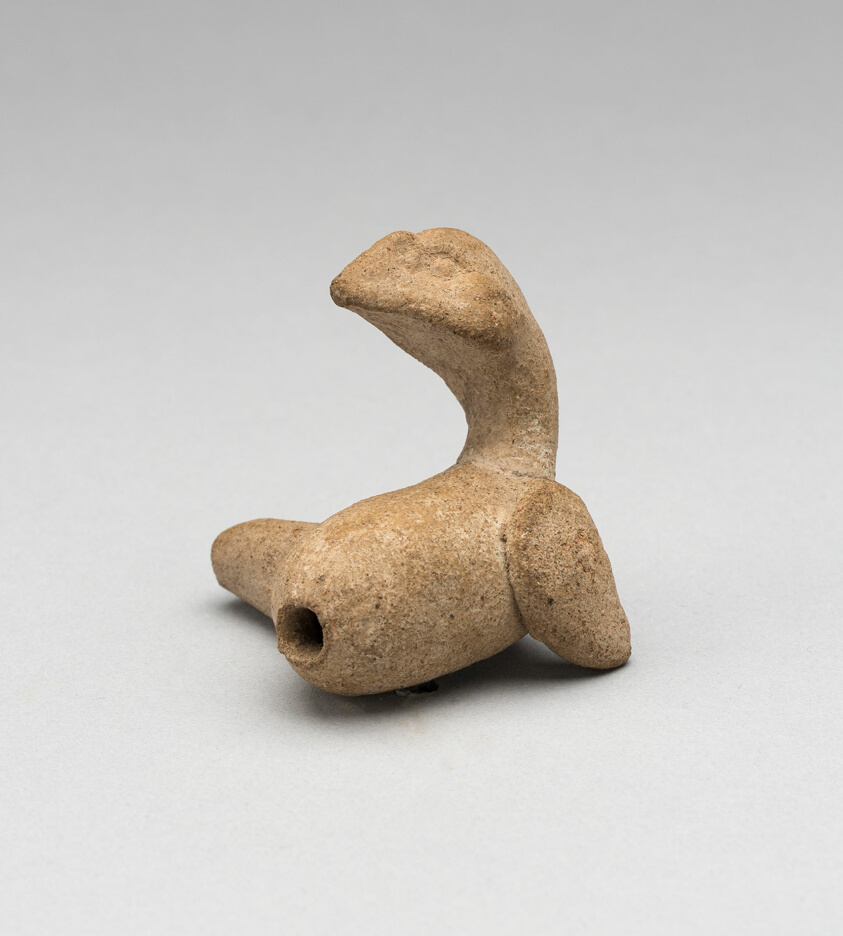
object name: Decorative Arts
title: Whistle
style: veracruz, Arts of the Americas, classic veracruz, mesoamerican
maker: Classic Veracruz; Veracruz, Mexico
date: c. 800 CE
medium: Ceramic and pigment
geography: Veracruz state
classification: musical instrument; american decorative arts; decorative arts; ceramics; art of the americas